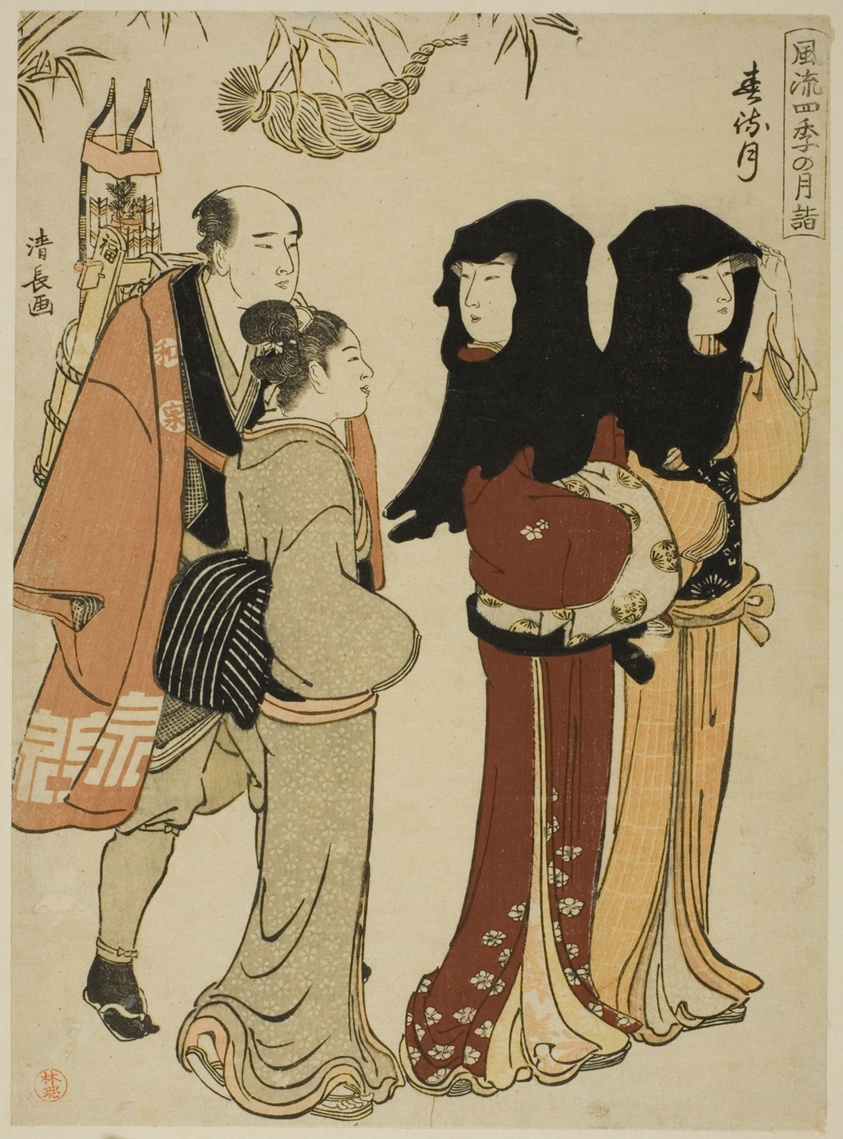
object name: Print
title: The Twelfth Month (Harumachizuki), from the series "Fashionable Monthly Visits to Sacred Places in the Four Seasons (Furyu shiki no tsuki mode)"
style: Japanese (culture or style)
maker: Torii Kiyonaga (Japanese, 1752-1815)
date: c. 1784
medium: Color woodblock print; chuban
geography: Japan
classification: woodblock print; print; asian art